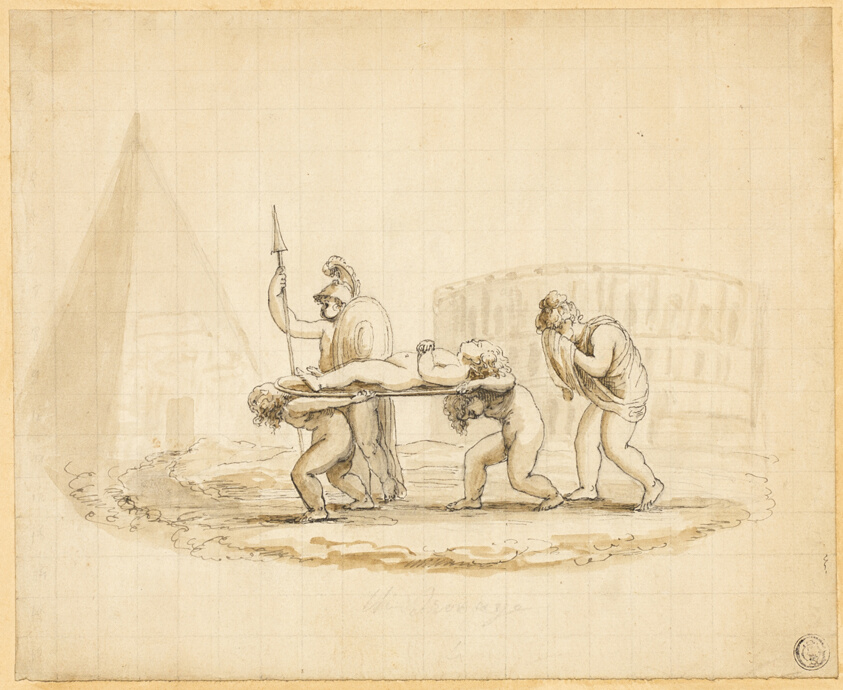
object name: Drawing and Watercolor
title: Putti Enacting Roman Funeral Procession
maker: Attributed to Lady Diana Beauclerk; English, 1734-1808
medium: Pen and black ink, with brush and brown and gray wash over graphite, squared in graphite, on cream laid paper, laid down on cream laid card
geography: England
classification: pen and ink drawings; drawings (visual works); prints and drawing; paper